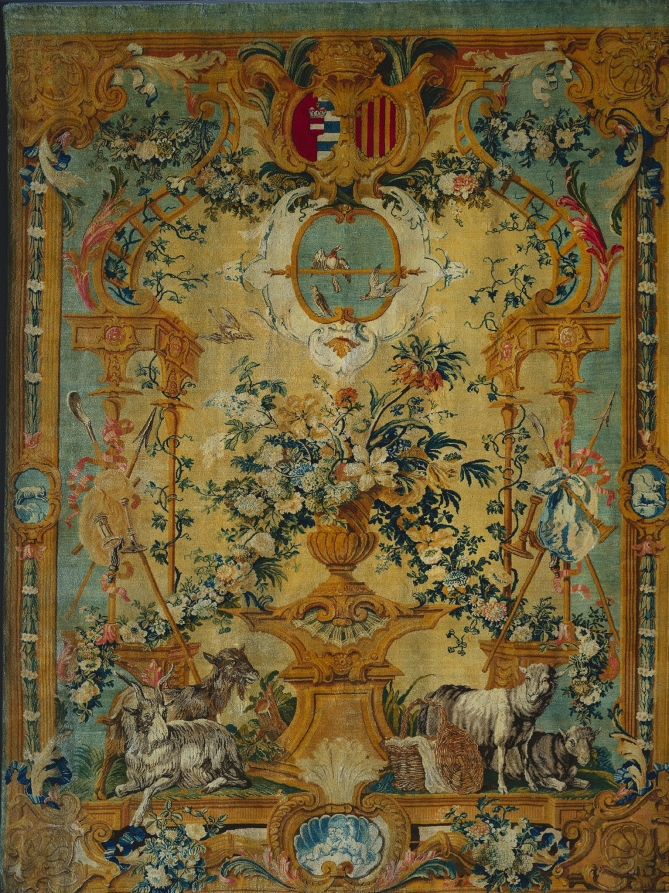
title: Panel: Spring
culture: France, early 18th century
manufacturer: Royal Savonnerie Manufactory, Chaillot Workshops (French, est. 1627)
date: c. 1715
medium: Savonnerie knotted-pile (144 symmetrical rug knots per square inch); wool, hemp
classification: Carpet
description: Courtiers and aristocrats anxious to model their lifestyles on the king also commissioned works from the same state manufactories that produced tapestries, carpets, and upholstery for the French monarchy. Established in the early 1600s, the Savonnerie factory provided both domestic furnishings for the king’s palaces and diplomatic gifts for foreign heads of state. The double coat of arms in this tapestry suggests that it was made for a count and countess who married in 1717. One of a group of four tapestries depicting the seasons, this work depicts the abundant flora and fauna of spring. The Cleveland Museum of Art rotates this tapestry with another from this group. The other two tapestries in the suite can be seen at the Toledo Museum of Art.